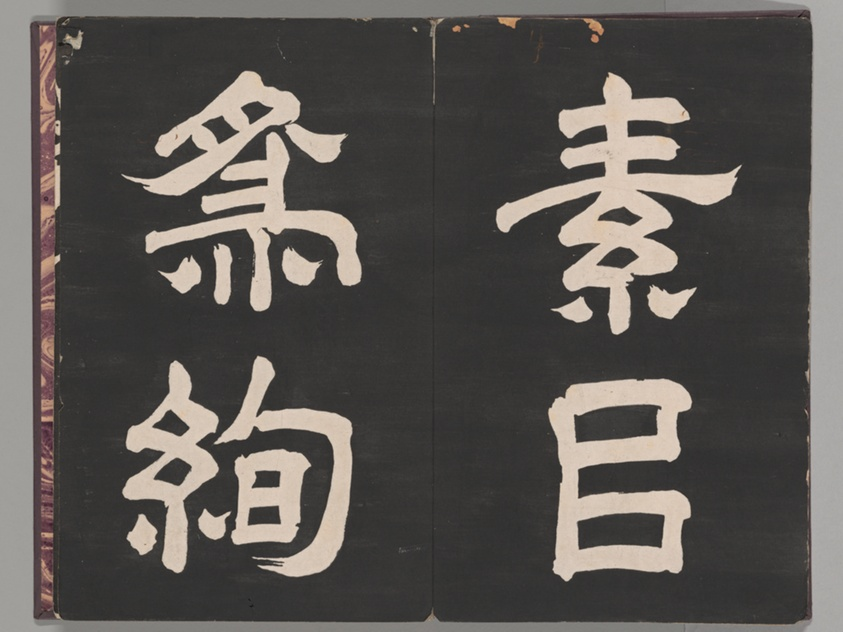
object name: Book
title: Soken sekisatsu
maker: Ito Jakuchu (Japanese, 1716-1800)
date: 1767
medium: Woodblock printed book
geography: Japan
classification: book